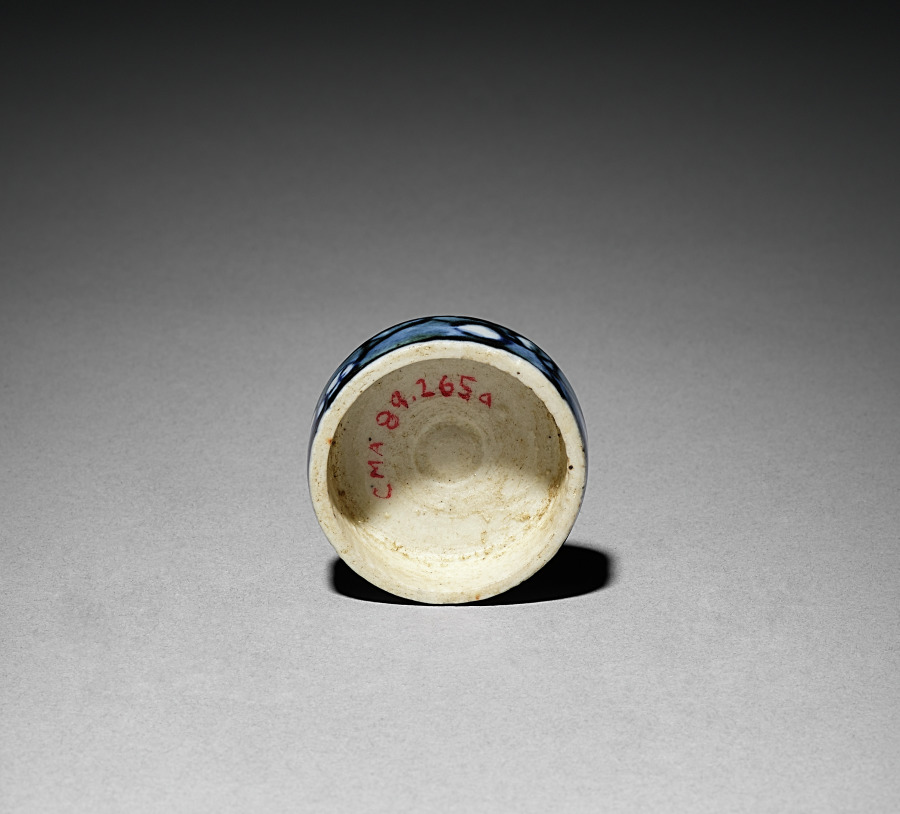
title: Tea Container (lid) with Plum Blossoms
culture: Japan, Edo period (1615–1868)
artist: Aoki Mokubei (Japanese, 1767–1833)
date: early 1800s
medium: porcelain with underglaze blue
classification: Ceramic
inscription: signed "Ro Mokubei" on base in underglaze blue.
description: Aoki Mokubei, born into a family of restaurateurs, was a potter, calligrapher, painter, and scholar, and is considered one of the three masters of later Edo period Kyoto ceramics. He specialized in porcelains fashioned after Chinese prototypes, and created works for steeped tea (sencha) such as these matching tea caddies decorated in an underglaze blue called sometsuke—literally “with applied dye.” He signed them on their bottoms. They also have intricately patterned silk sleeves to both beautify and protect them. On the exterior of the lid of the outer wooden box that contains them, it is written that Mokubei inscribed and painted an image on the box. On the interior of the lid, the signature and seals of a former owner are written. Mokubei has signed the lid of the inner box, and a charming ink and light color composition of West Lake in Hangzhou in China covers its three sides. On the fourth side is a long inscription by Mokubei describing the scene.